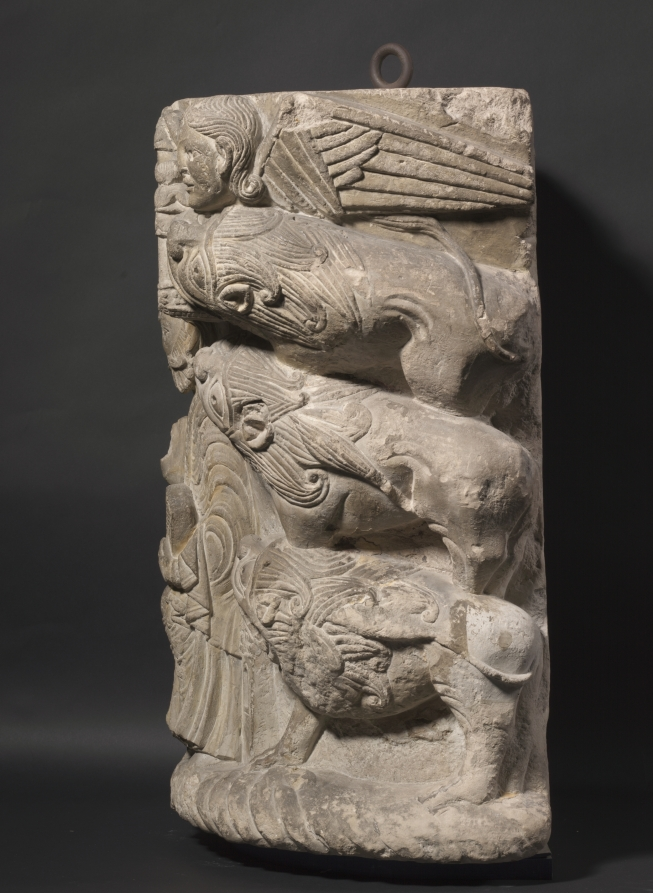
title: Daniel in the Lion's Den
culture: France, Saint-Aignan-sur-Cher, 12th century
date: c. 1125–50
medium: limestone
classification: Sculpture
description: According to the Old Testament, Daniel was cast into a lion’s den as punishment for his belief in a single god, but he was miraculously delivered from harm on account of his faith. This story is related here, with Daniel flanked by lions and the angel sent by God to save him. Together with other decorated capitals, this imposing work of Romanesque sculpture once decorated the interior of the church of Saint-Aignan-sur-Cher, a city in central France.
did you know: During the 12th century, churches used images to teach the faithful who were illiterate. While Daniel lived before Jesus, he is depicted holding a bible, alluding to the continuity between the Old and New Testaments.